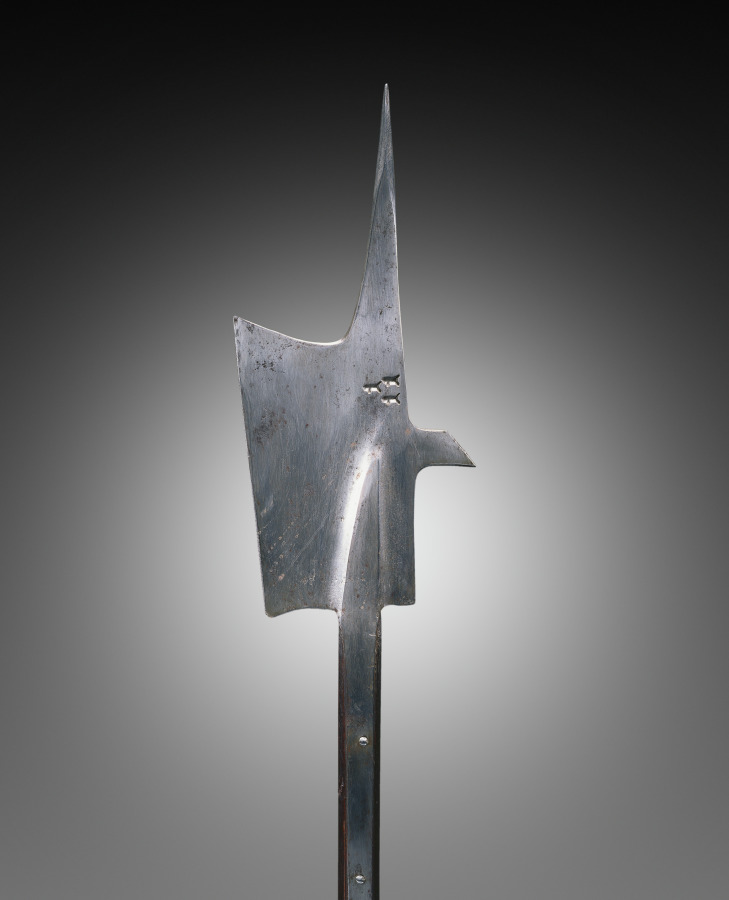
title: Halberd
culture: Switzerland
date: c. 1480–1500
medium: steel; wood haft (rectangular with planed corners)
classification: Arms and Armor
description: The halberd was a staff weapon favored by European infantries (foot soldiers) of the 1400s and 1500s for its versatility and deadly effect. The word halberd comes from the German words Halm (staff) and Barte (axe). The halberd is, in fact, an axe that served multiple functions: the axe blade was used for hacking, the spike for thrusting, and the beak for piercing plate armor or for pulling a knight from his saddle. The halberd was used by shock troops (those who lead an attack) and by Swiss and German mercenaries. After about 1550, the halberd gradually became less functional. Its large blade provided space for coats of arms and insignia. By the late 1500s, the parade halberd had become a ceremonial weapon for palace guards.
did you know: A Franciscan monk wrote in the 1340s how terrible and fierce the Swiss, armed with halberds, were at the Battle of Morgarten.